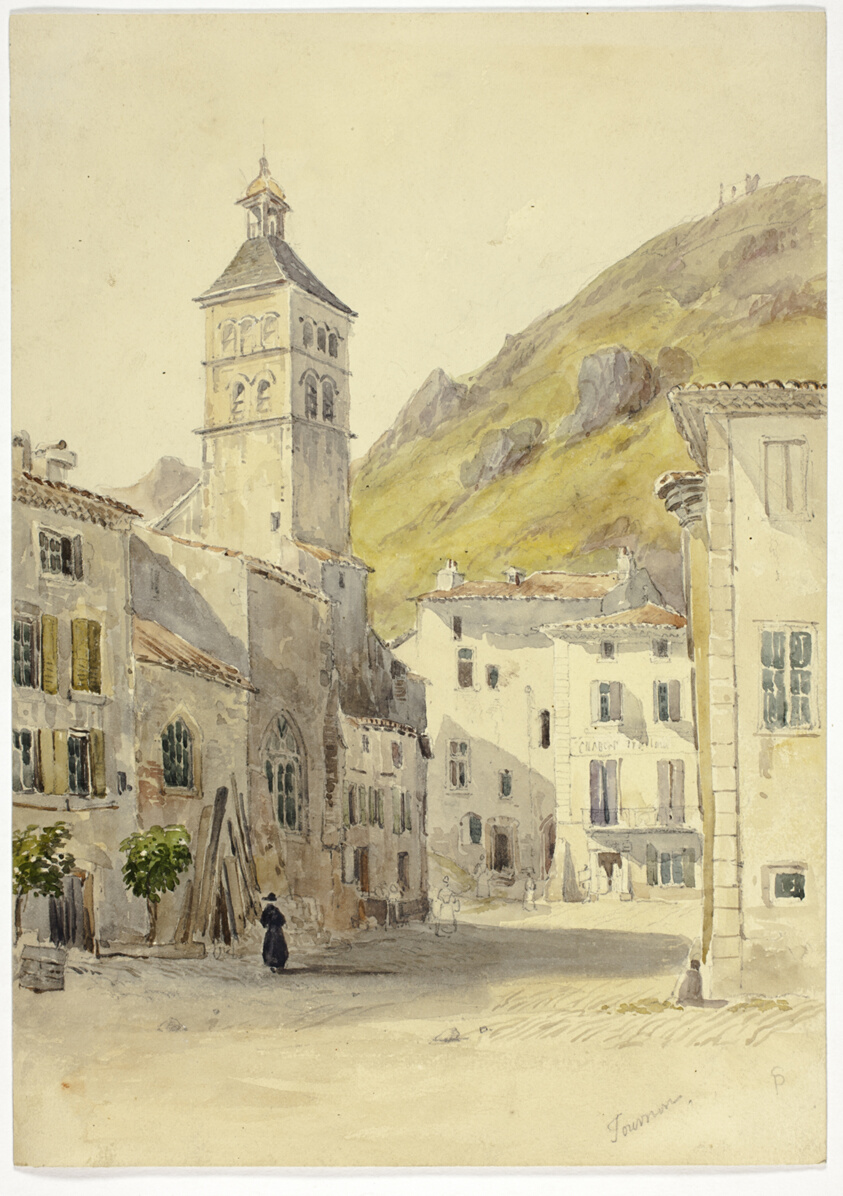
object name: Drawing and Watercolor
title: Tournon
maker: Style of Samuel Prout (English, 1783-1852); or Paul Sandby (English, 1725-1809); or Caleb Robert Stanley (English, c. 1795-1868)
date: 1735-1868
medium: Watercolor over graphite, on cream wove paper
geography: England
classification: watercolor; drawings (visual works); prints and drawing